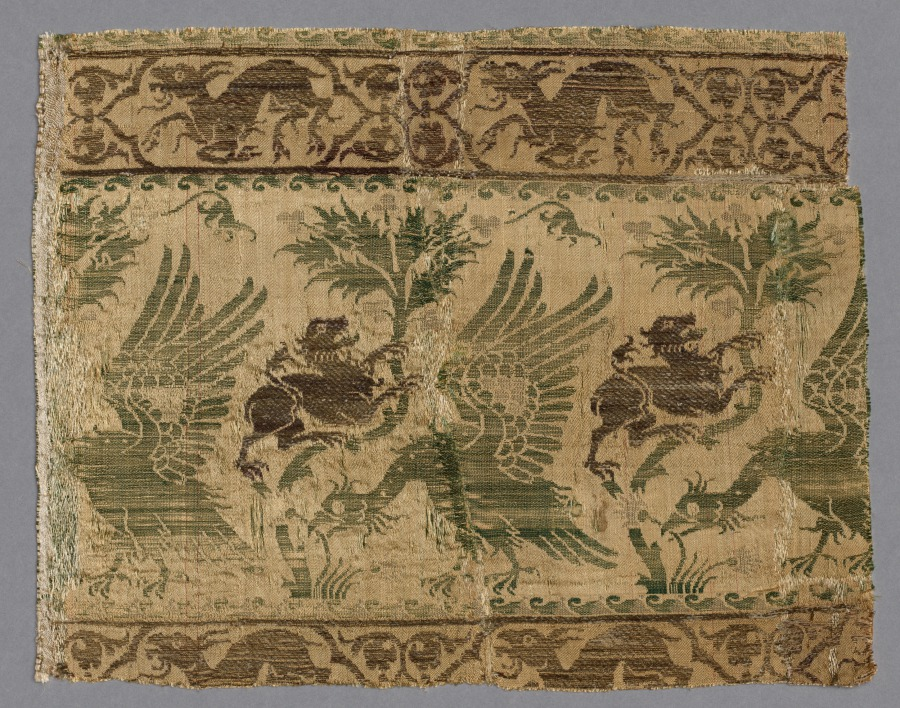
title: Silk and Gold Textile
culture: Italy, last third of the 14th century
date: 1360–1400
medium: lampas weave, silk and gold thread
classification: Textile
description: Lucca, Venice, Florence, Bologna, and Genoa are known to have been the principal silk weaving cities in Italy during the 14th and 15th centuries. It is not possible, however, to distinguish which silks were woven in each city. Silks like these were sold to royalty, nobility, and churches throughout Europe by Italian merchants in Bruges, Antwerp, Paris, London, and Avignon.